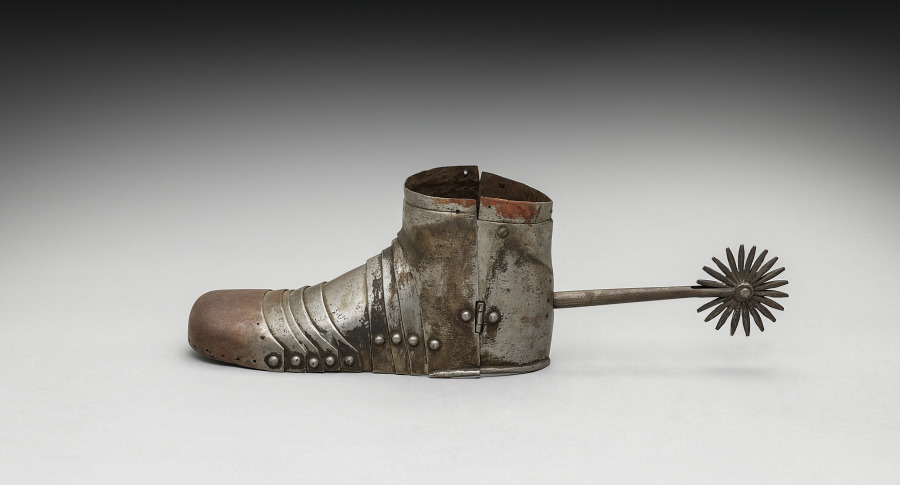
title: Left Sabatoun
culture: Germany, 19th century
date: 1801–1900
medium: steel with black paint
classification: Arms and Armor